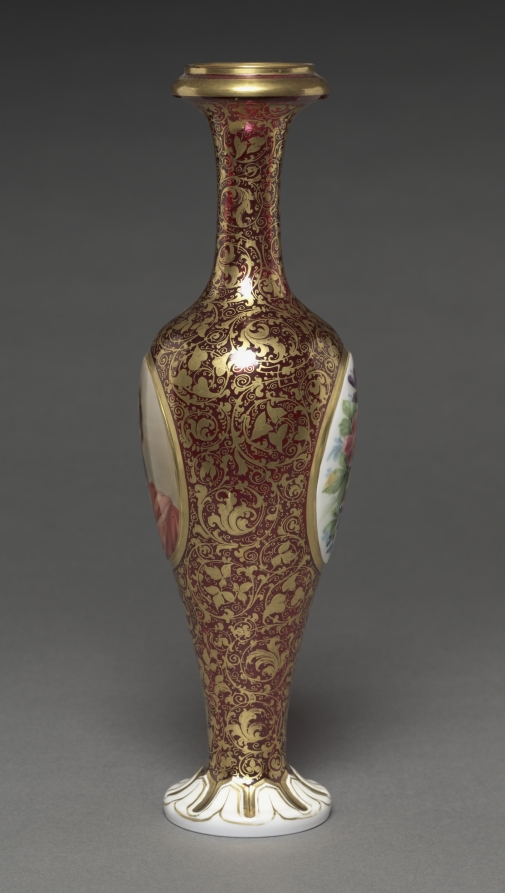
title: Vase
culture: Bohemia (?), 19th century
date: 1840–1860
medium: glass with enamel and gilt decoration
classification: Glass